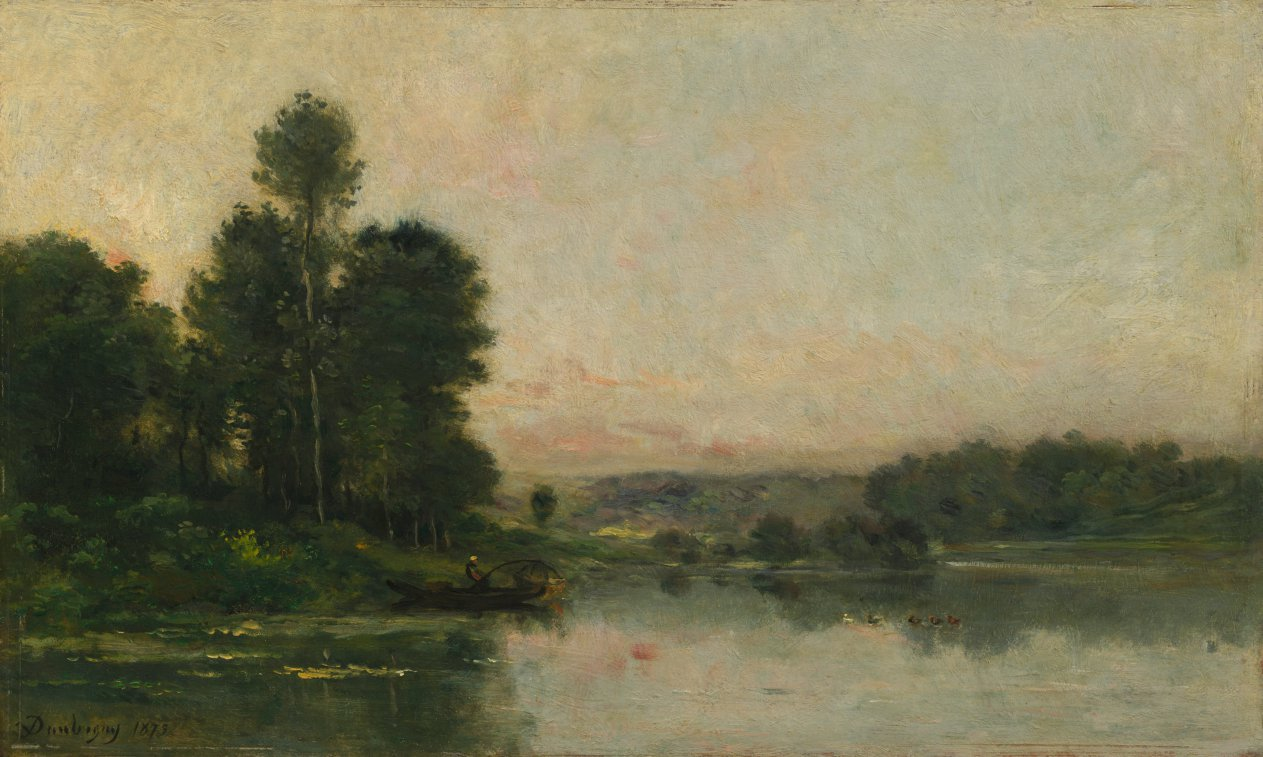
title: The Hillsides of Méry-sur-Oise, Opposite Auvers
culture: France, 19th century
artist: Charles François Daubigny (French, 1817–1878)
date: 1873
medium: oil on wood panel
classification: Painting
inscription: Signed lower left in black: Daubigny 1873